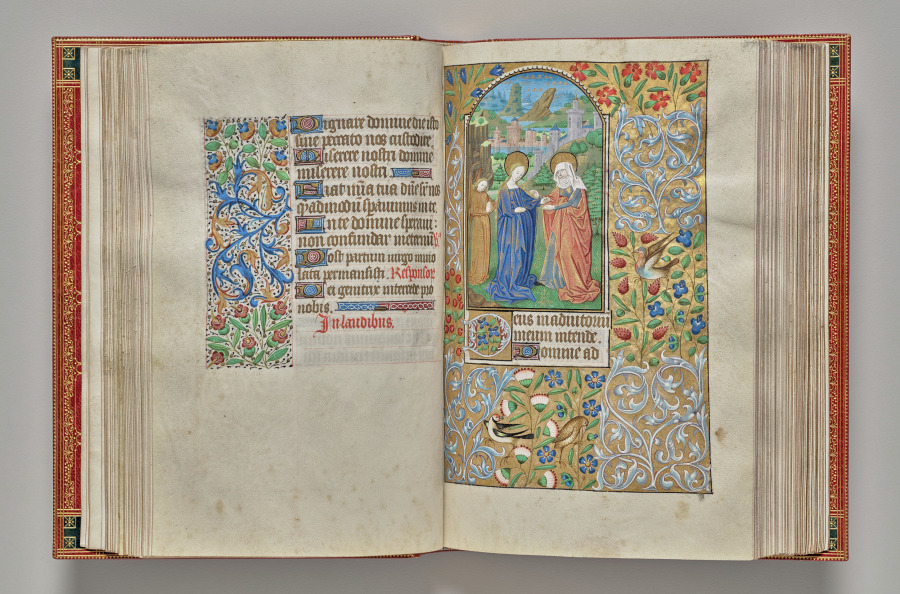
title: Book of Hours (Use of Rouen): fol. 39r, The Visitation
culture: France, Rouen, 15th century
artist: Master of the Geneva Latini (French, active Rouen, 1460–80)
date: c. 1470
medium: ink, tempera, and gold on vellum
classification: Bound Volume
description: In the late 1400s and early 1500s Rouen was an established and important center of book production. The city’s cathedral had a wealthy chapter that spent large sums of money to commission books and to maintain its extensive library. The stationers and booksellers would have likely been concentrated in or near the cathedral precinct. This artist, named after a manuscript now in Geneva, was Rouen’s principal illuminator during the second half of the 1400s.